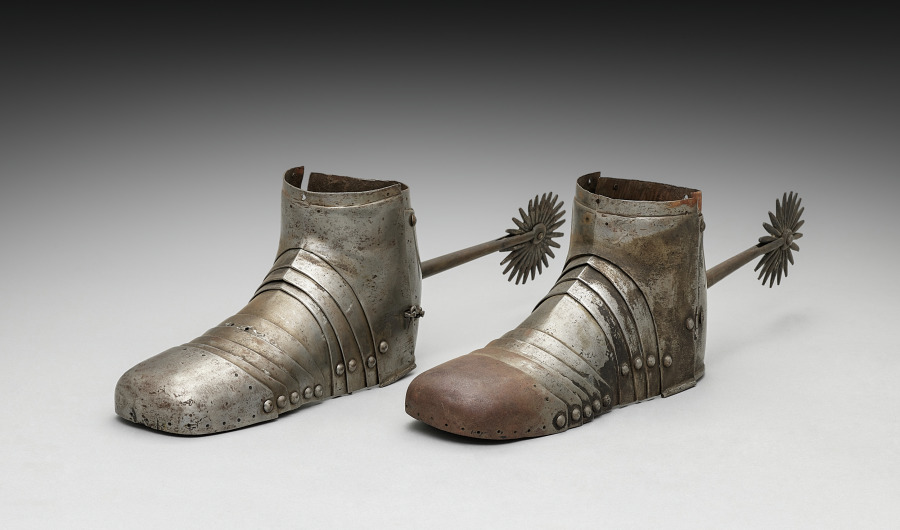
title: Left Sabatoun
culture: Germany, 19th century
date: 1801–1900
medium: steel with black paint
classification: Arms and Armor